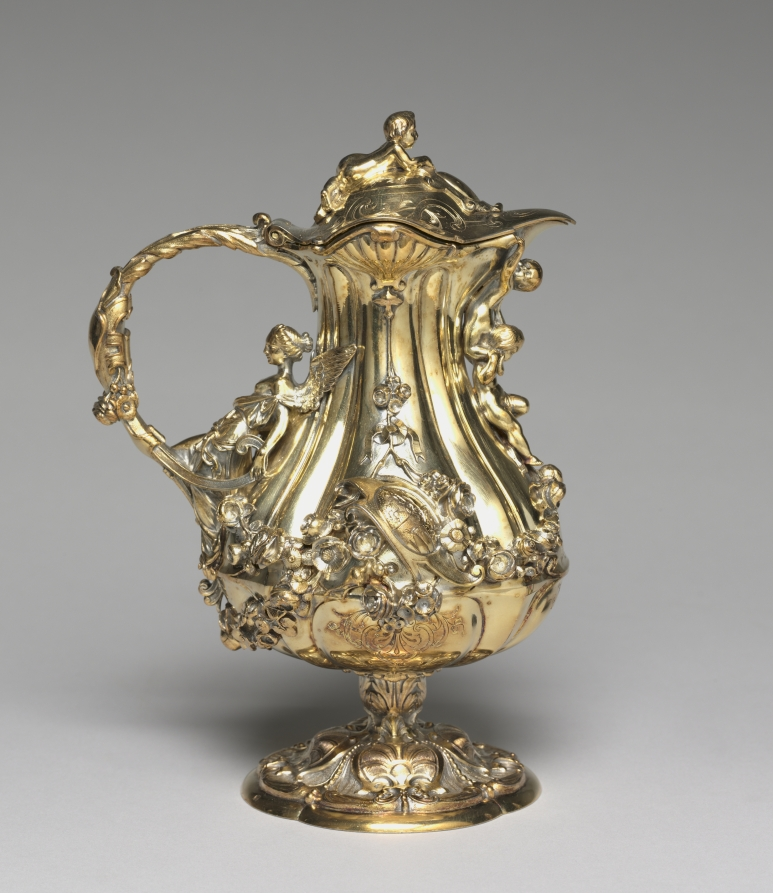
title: Covered Jug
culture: France, 19th century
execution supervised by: Jean-Valentin Morel (French, 1794–1860)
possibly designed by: Jules Dieterle (French, 1811–1889)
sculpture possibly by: Jules Klagmann (French, 1810–1867)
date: c. 1845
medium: gilded silver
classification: Silver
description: The elegance and richness of this ewer demonstrate the high level of technical mastery achieved by its maker. Morel studied under his father, a Parisian lapidary (someone who cuts, polishes, and engraves hard stones), and with Adrien Vachette, a maker of gold boxes. In 1842 he went into partnership with Charles-Edmond Duponchel, which lasted until the late 1840s, at which time he established himself in London, remaining there until 1852, when he returned to Paris. Morel frequentlyfollowed the designs of others, and it has been suggested that in the case of this pitcher his well-known contemporary, Jules Dieterle (1811-1889), may have conceived the overall form. The female figure seems to have been based on a design by the sculptor Jules Klagmann (1810-1867).